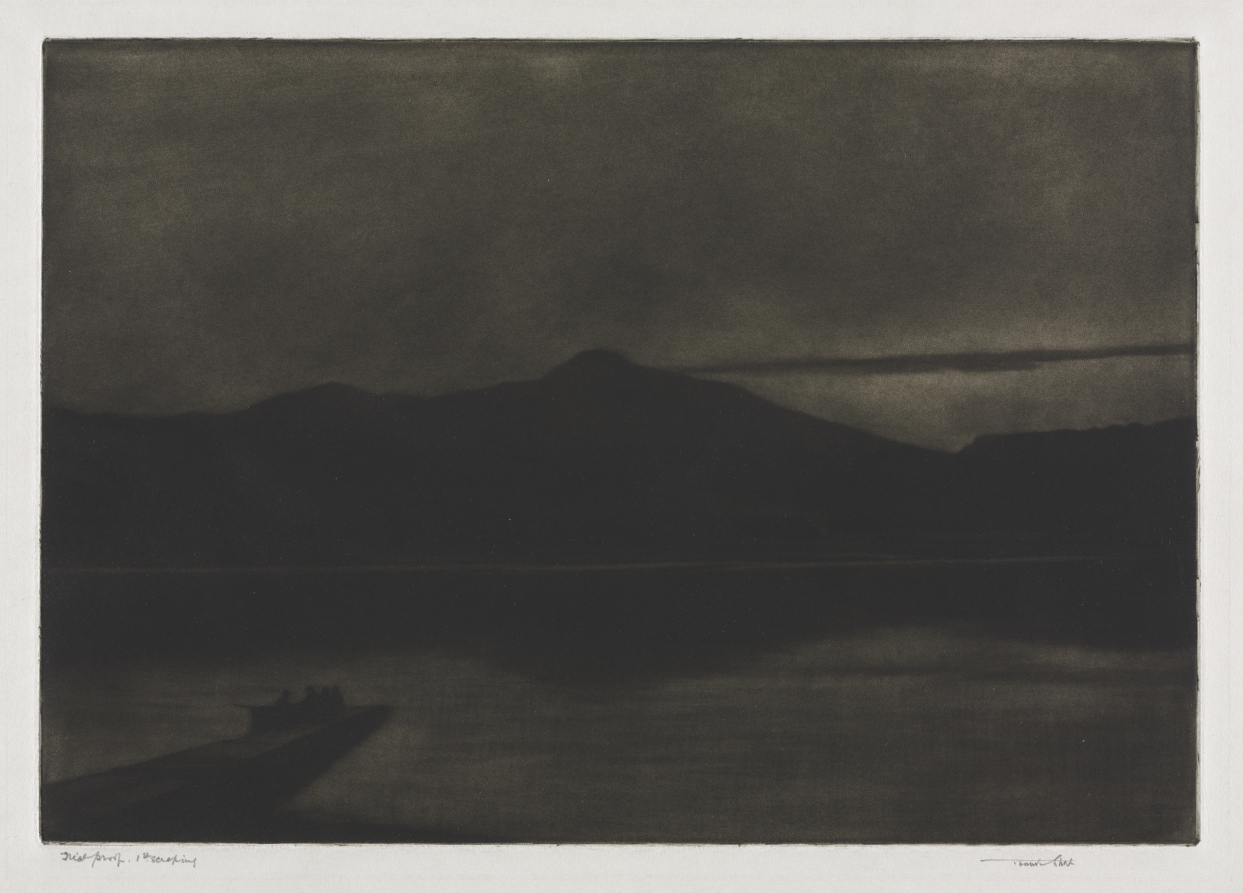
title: Screel Hill and Urr Water from Kypford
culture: England, 20th century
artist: Frank Short (British, 1857–1945)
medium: etching and mezzotint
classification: Print